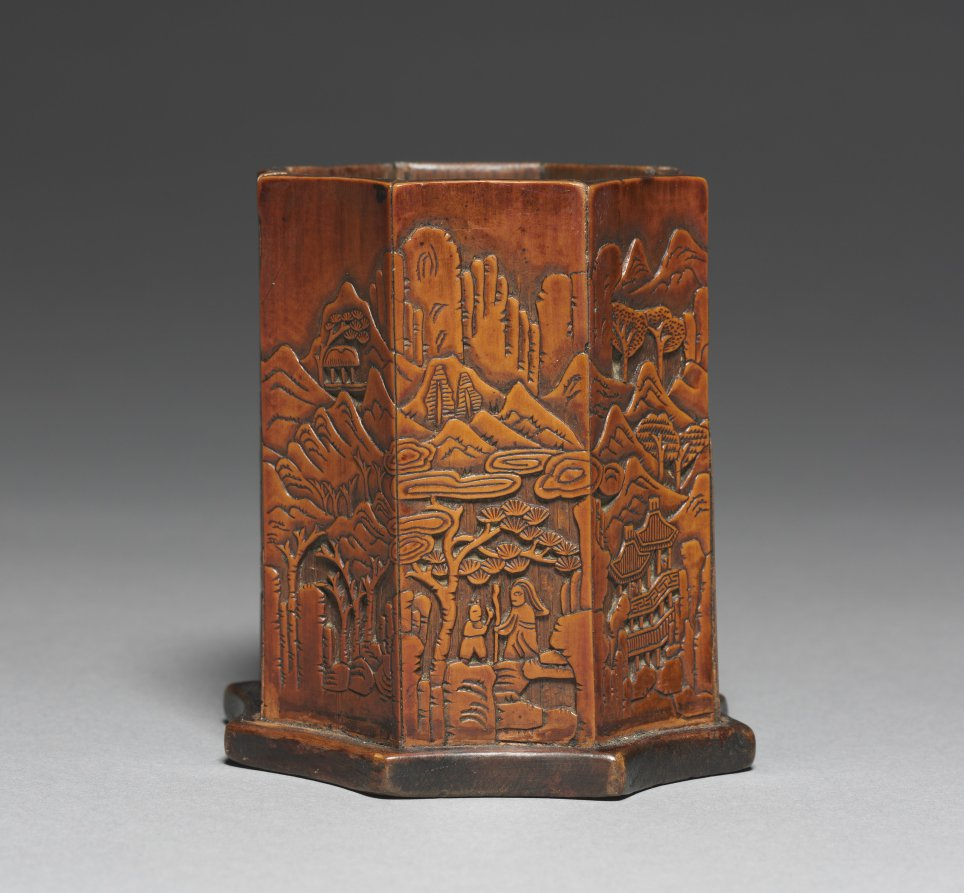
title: Brush Holder with Bamboo and Landscape Design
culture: Korea, Joseon dynasty (1392–1910)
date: 1800s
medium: carved bamboo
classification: Wood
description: An 18th-century Korean collector Yu Man-joo (1755–1788) wrote that “spending money on luxury clothing, dishes, and decorations for the home is a waste, but acquiring fancy writing tools helps to develop elegant taste and high-mindedness.” Inspired by aesthetic discourses on elegance versus vulgarity in late Ming Chinese literature, Korean collectors in the late 1700s and 1800s strove to assemble objects that would display their intellect and sophisticated taste. Stationery objects in particular—printed books, finely crafted brushes, brush holders, ink stones, water droppers, stone wares with grayish-white crackled glazes as well as bronze vessels, and incense burners—were all objects that reflected pure and elegant taste.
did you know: Stationery objects such as this brush holder were highly appreciated among scholars, not only for their function, but for their aesthetic.